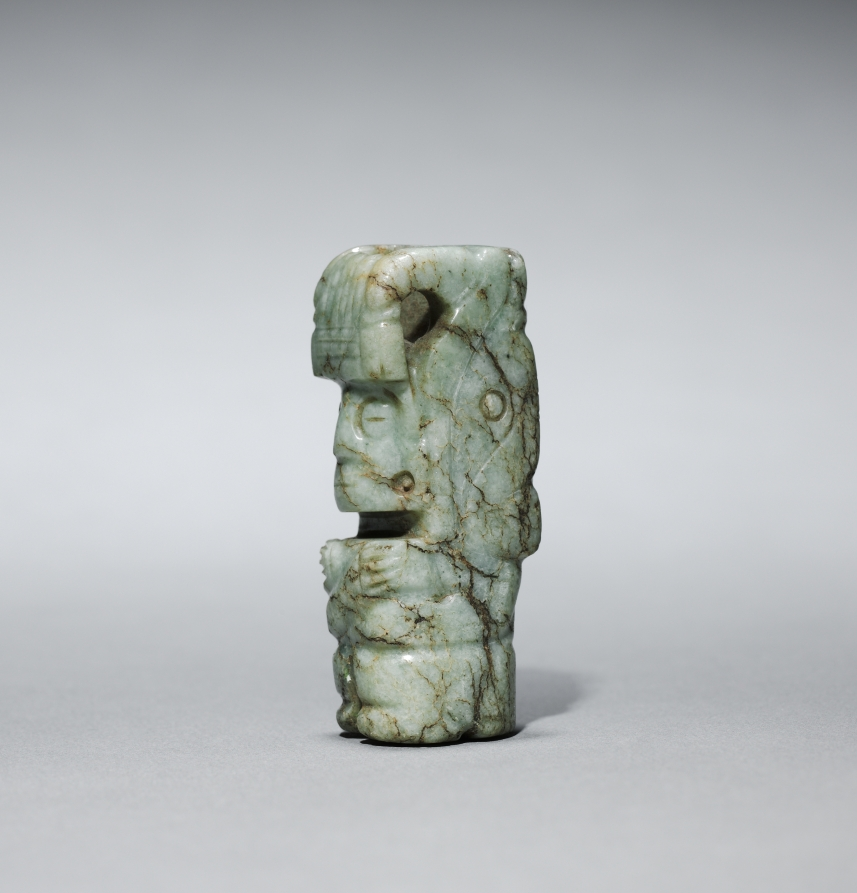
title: Figurine Pendant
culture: Mexico, Oaxaca, Mixtec style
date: c. 1200–1519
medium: jade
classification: Jade